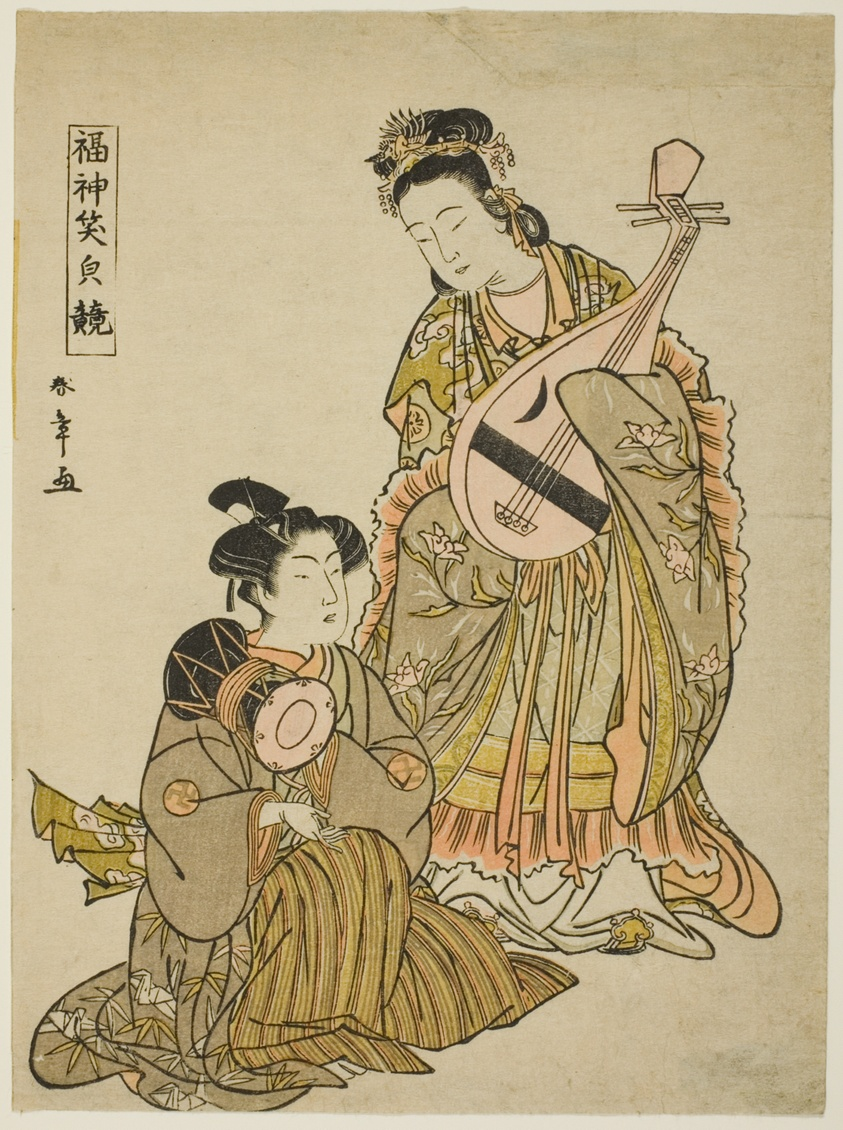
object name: Print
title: The Goddess Benten Holding a Biwa and a Young Man Holding a Shoulder Drum, from the series "Comparing the Smiles of the Lucky Gods (Fukujin egao kurabe)"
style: Japanese (culture or style)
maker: Katsukawa Shunsho 勝川 春章; Japanese, 1726–1792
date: late 1780s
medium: Color woodblock print; koban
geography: Japan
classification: woodblock print; print; asian art